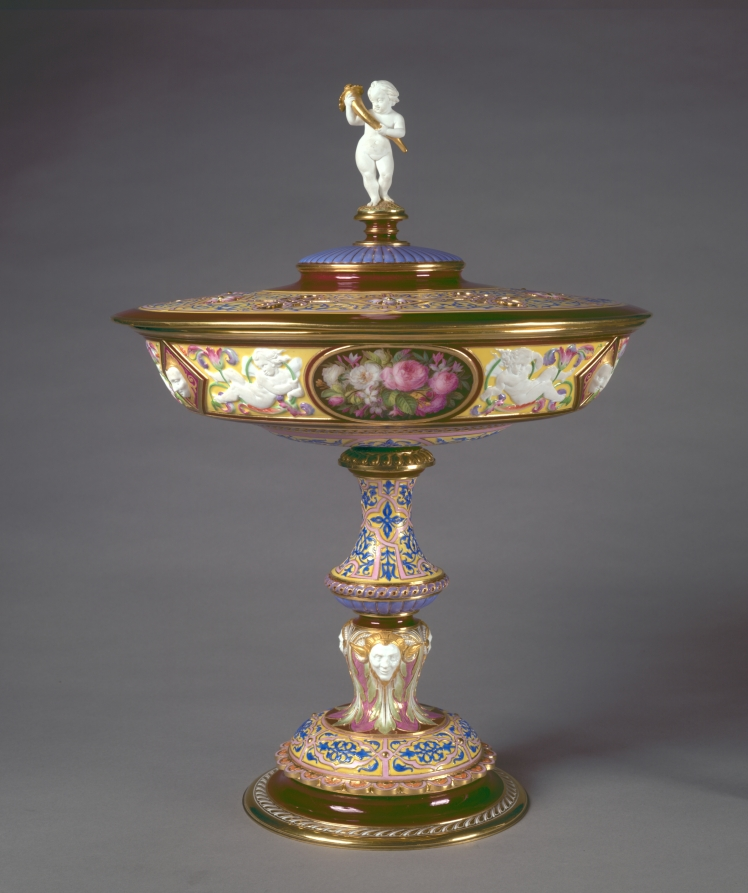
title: Standing Cup and Cover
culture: France, Sèvres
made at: Sèvres Porcelain Factory (French, est. 1756)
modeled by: Hyacinthe-Jean Regnier (French, 1803–1870)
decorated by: Francois-Hubert Barbin (French, 1786-)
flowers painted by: Jacques-Nicolas Sinsson (French)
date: 1844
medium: porcelain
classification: Ceramic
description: The official French porcelain factory at Sèvres has always been one of Europe's most important ceramic manufacturers, famous for its decorative pieces as well as more utilitarian wares. This vase in the Renaissance style, its design inspired by 16th-century French examples, is clearly in the tradition of elaborately conceived and decorated pieces intended for use by the French court or as presentation pieces by its monarchs. The latter was the fate of this Covered Cup, acquired in 1846 by Queen Marie-Amélie d'Orleans, the wife of Louis-Philippe, king during the July Monarchy (1830-48). Soon thereafter the vase was presented to a now unknown person. It is one of four pieces of this design made at the Sèvres factory, and the only one known today to have survived.